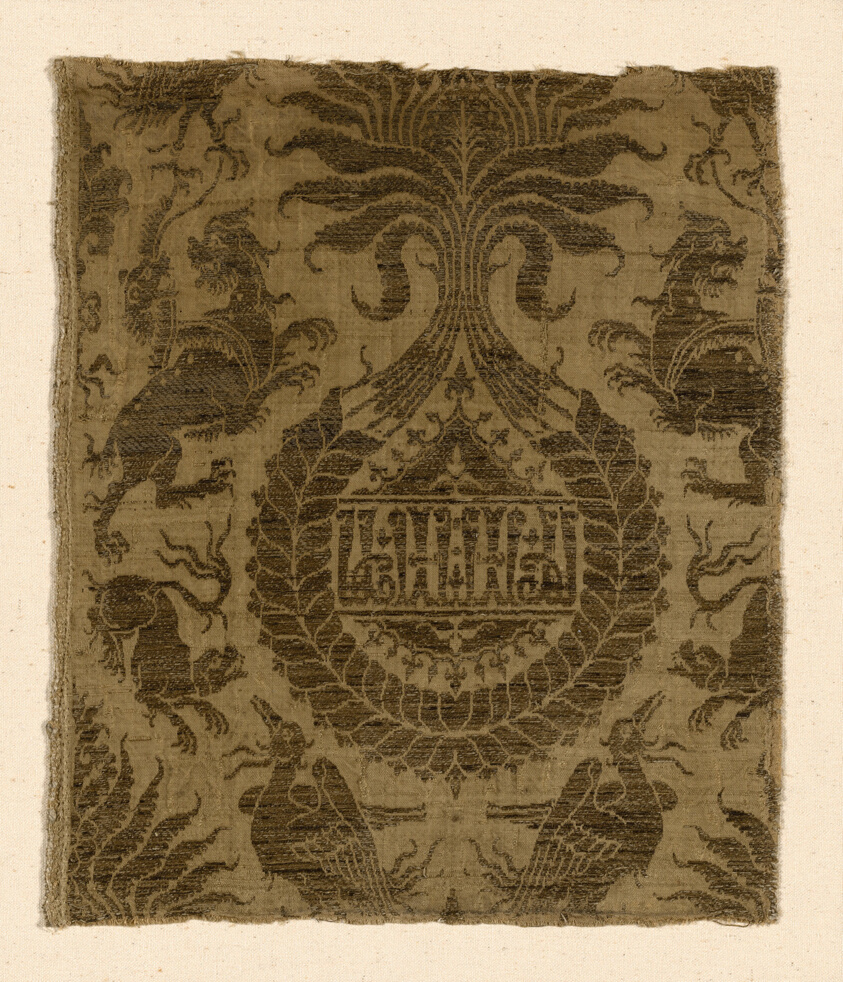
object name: Textile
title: Fragment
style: Renaissance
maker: Italy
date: 14th century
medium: Silk, gilt-animal-substrate-wrapped linen, warp-float faced 2:1 twill weave with supplementary patterning wefts bound by secondary binding warps in weft-float faced 1:3 twill interlacings; left selvage present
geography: Lucca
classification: textile; weaving